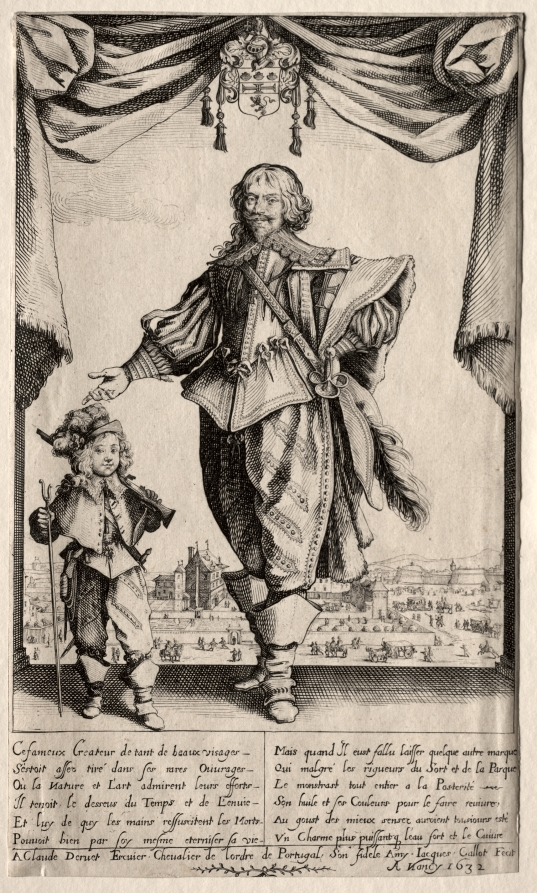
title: Claude Deruet and His Son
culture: France, 17th century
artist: Jacques Callot (French, 1592–1635)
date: 1632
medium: etching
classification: Print